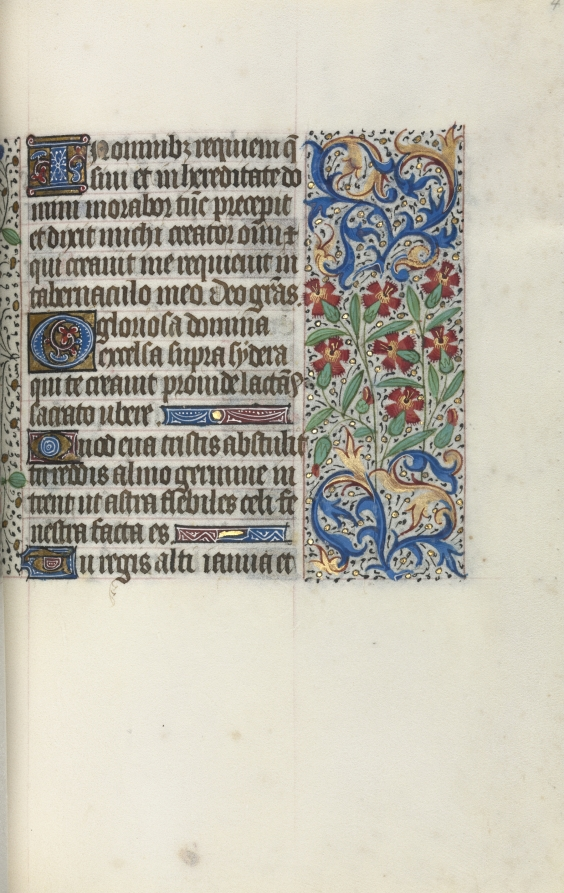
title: Book of Hours (Use of Rouen): fol. 47r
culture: France, Rouen, 15th century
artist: Master of the Geneva Latini (French, active Rouen, 1460–80)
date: c. 1470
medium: ink, tempera, and gold on vellum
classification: Bound Volume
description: In the late 1400s and early 1500s Rouen was an established and important center of book production. The city’s cathedral had a wealthy chapter that spent large sums of money to commission books and to maintain its extensive library. The stationers and booksellers would have likely been concentrated in or near the cathedral precinct. This artist, named after a manuscript now in Geneva, was Rouen’s principal illuminator during the second half of the 1400s.